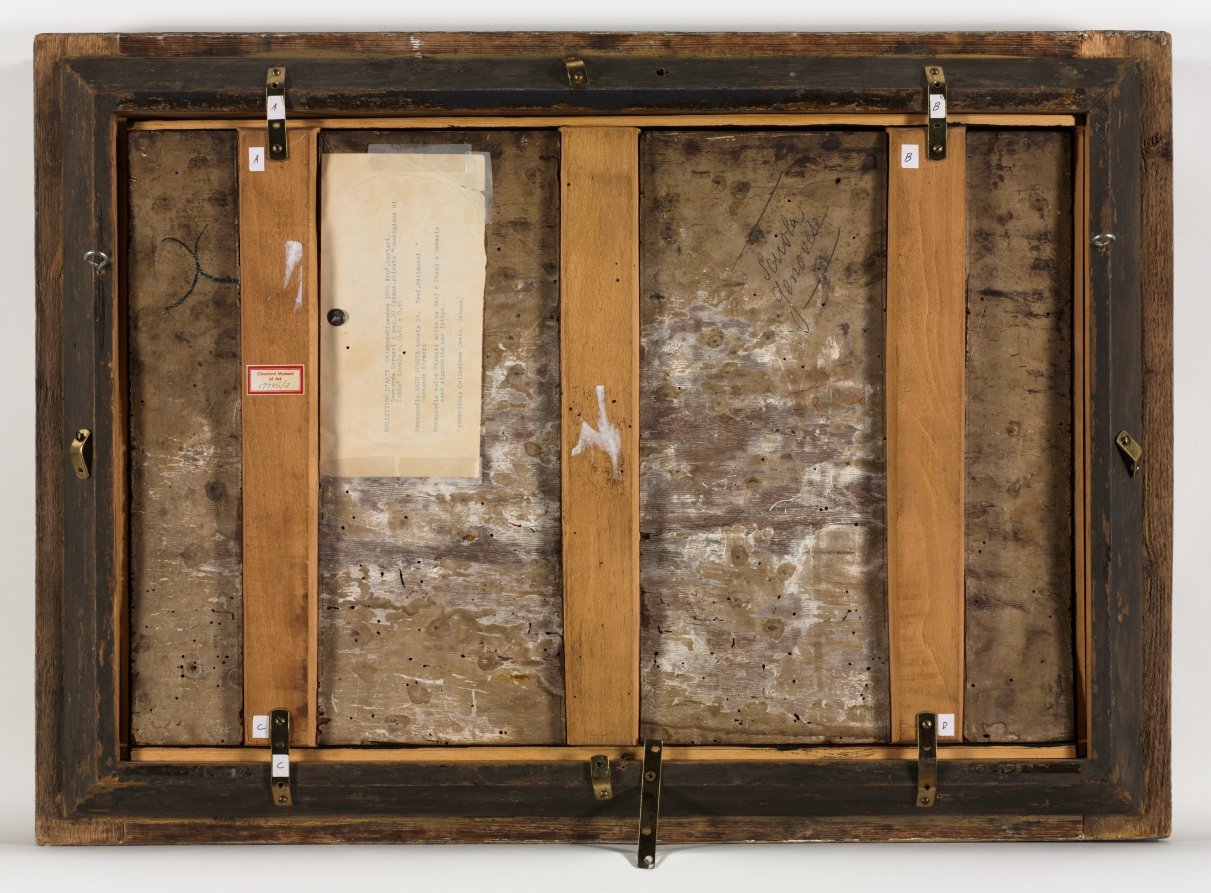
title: The Healing of Tobit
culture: Italy, 17th century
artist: Bernardo Strozzi (Italian, 1581?-1644)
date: c. 1625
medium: oil on wood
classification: Painting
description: This scene is the moving conclusion of the story of Tobias, the young man at the right. It addresses the themes of family devotion and trust. Tobias’s father sent him on a long journey to retrieve family money. The angel Raphael appeared as a relative, offering the traveler protection against such things as an attack by a huge fish, whose organs Tobias took on Raphael’s advice. Upon his return home, Tobias discovers his father has gone blind, and Raphael advises him to place the fish’s gallbladder on his father’s eyes to cure him. Strozzi depicts the miraculous cure and the moment in which Raphael reveals that he is an angel.